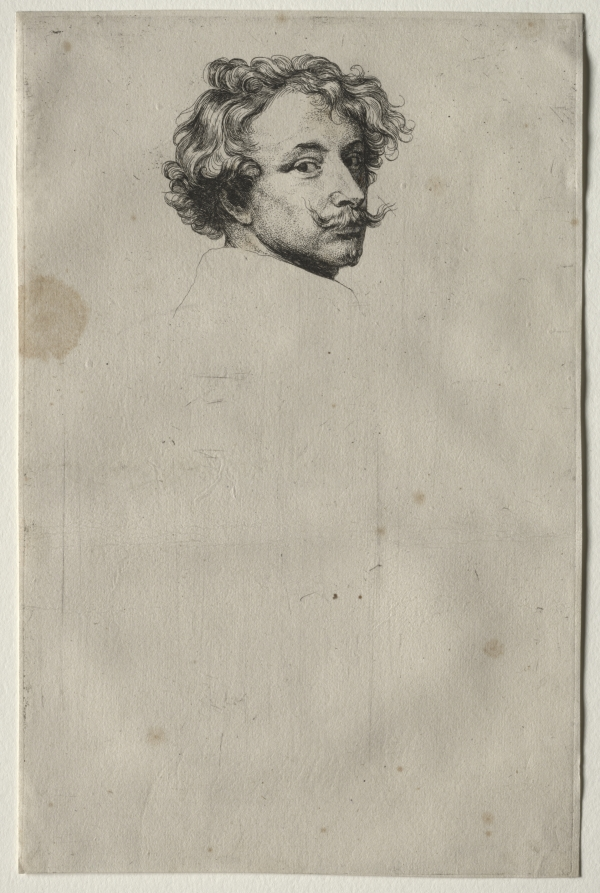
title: Self-Portrait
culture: Flanders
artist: Anthony van Dyck (Flemish, 1599–1641)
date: 1645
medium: etching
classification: Print